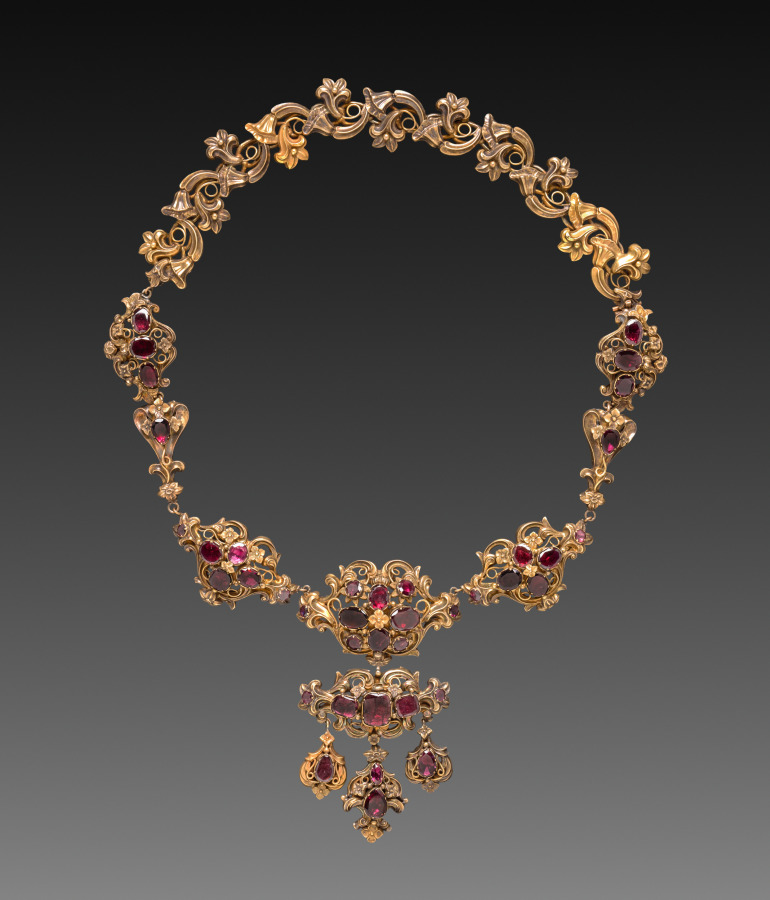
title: Necklace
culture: Germany, possibly, 19th century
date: c. 1840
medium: gold and jewels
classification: Jewelry